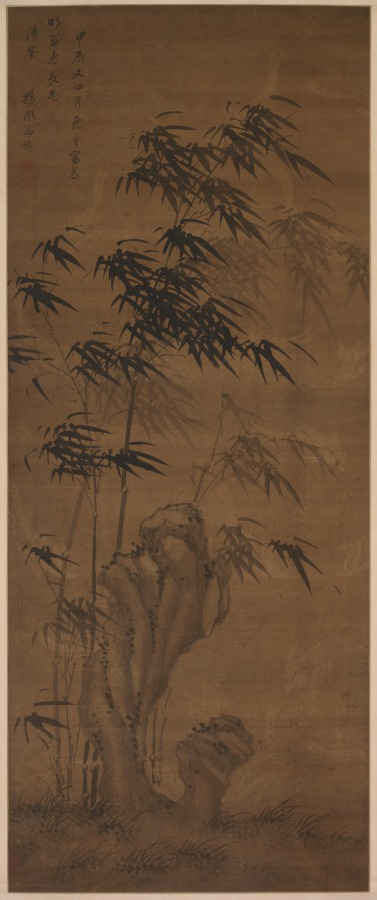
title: Bamboo in the Wind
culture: China, Qing dynasty (1644–1911)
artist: Ma Yu (Chinese, active 1706–1724)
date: 1724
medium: hanging scroll; ink on silk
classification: Painting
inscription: Artist's inscription and signature in upper left corner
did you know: In traditional Chinese culture, bamboo symbolizes a gentleman's virtuous resilience and flexibility.